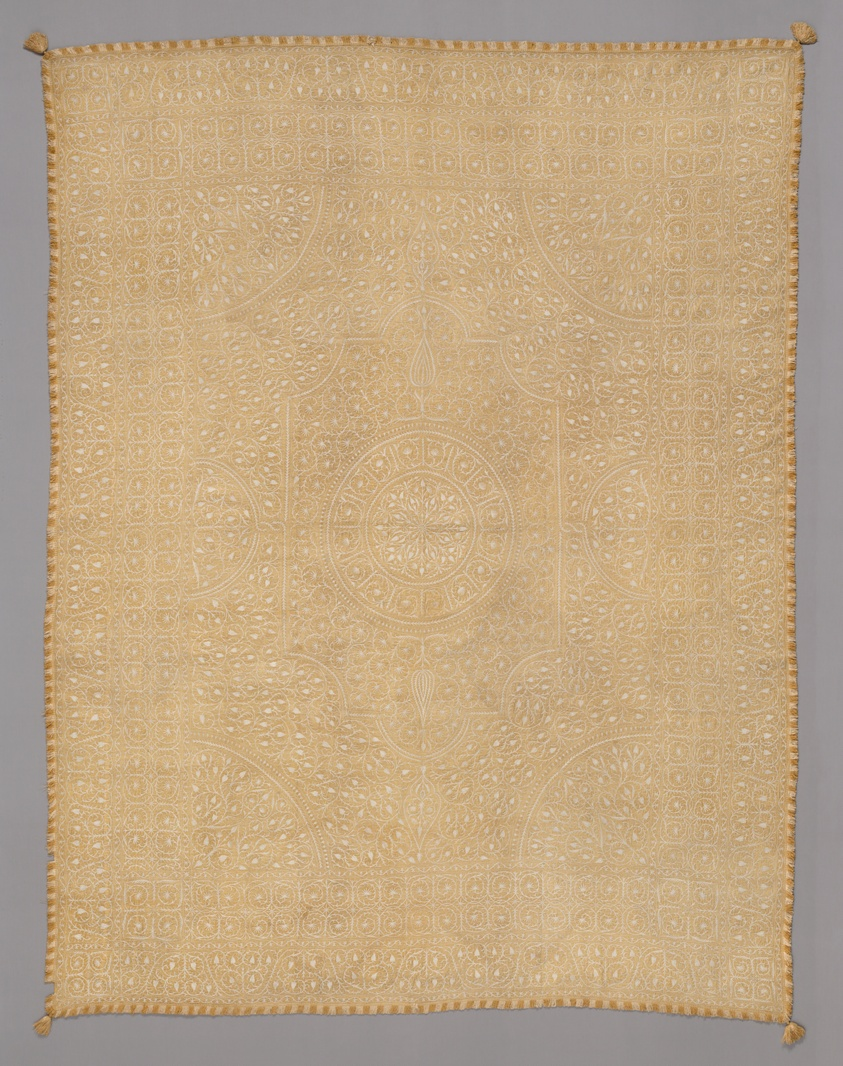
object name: Textile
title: Cover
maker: Made in Bengal, India, for the Portuguese market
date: 1601/50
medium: Three panels joined: silk (tussar), plain weave; embroidered with cotton in chain (tambour work) stitches; lining: cotton, plain weave; edging: silk, plain weave with looped and plied warp fringe; attached silk and cotton tassels at all four corners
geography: India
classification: needlework (visual works); textile; embroidery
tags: floral motifs, cartouches, circles, flowers, foliage, geometric, medallions, vines